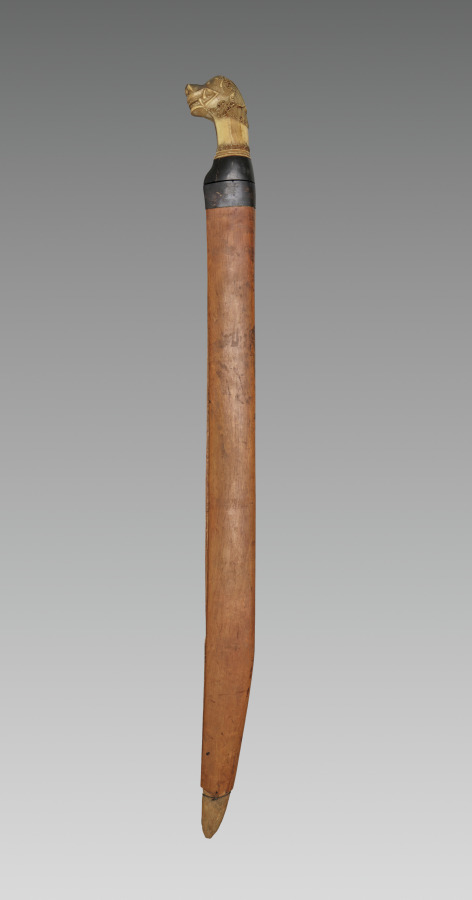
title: Sword and Scabbard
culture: Java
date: 1700s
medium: steel and ivory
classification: Arms and Armor